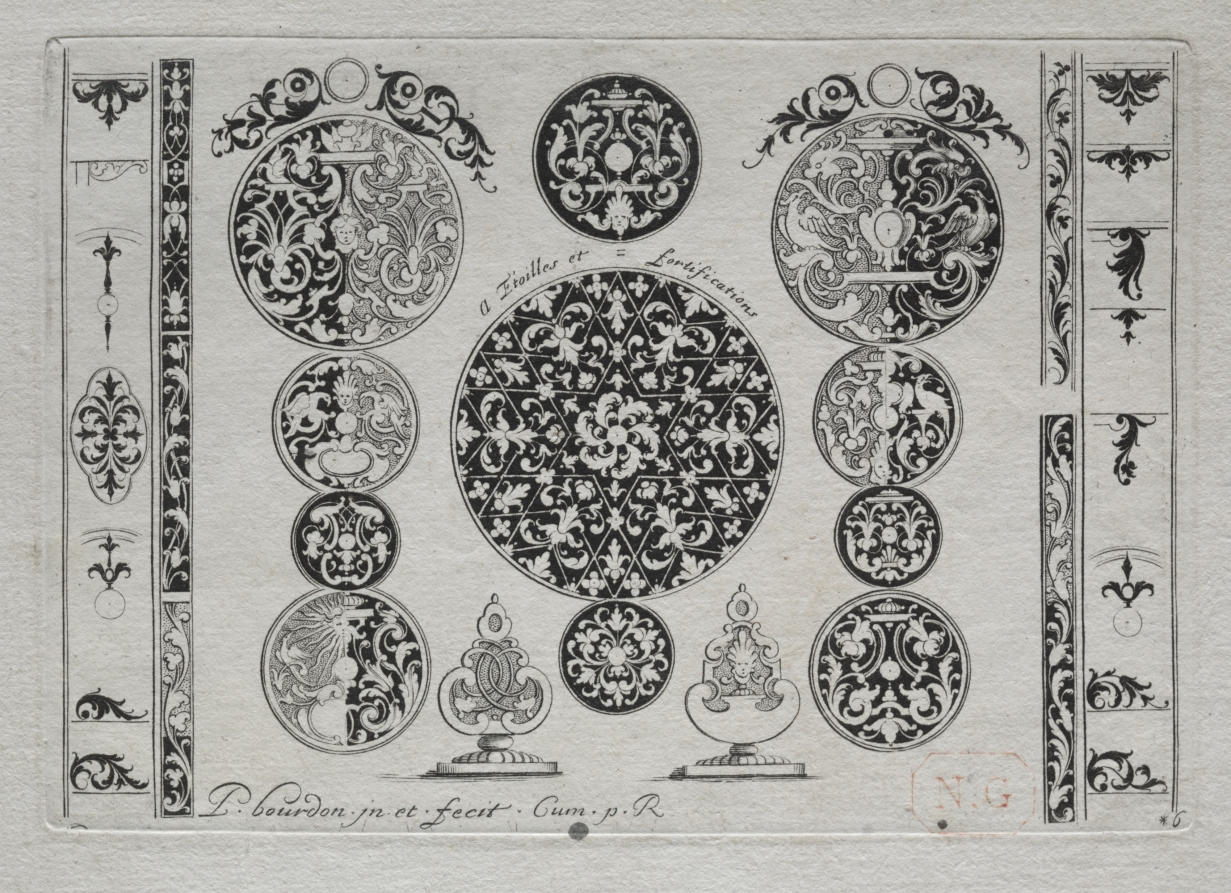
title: # 7from " Livre second essais de gravjre " Second book of Engraved Designs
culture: France, 18th century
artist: Pierre Bourdon (French)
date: c. 1703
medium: etching and engraving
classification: Print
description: This etching is from a set of prints showcasing decorative patterns by Bourdon. The title page for the set explains that the designs are “useful for clockmakers, goldsmiths, chiselers, engravers and other people.” These craftsmen who made ornamented objects sometimes consulted printed designs for inspiration. However, pattern prints similar to Bourdon’s also catered to aristocrats and wealthy professionals who pursued knowledge about artists and current styles.